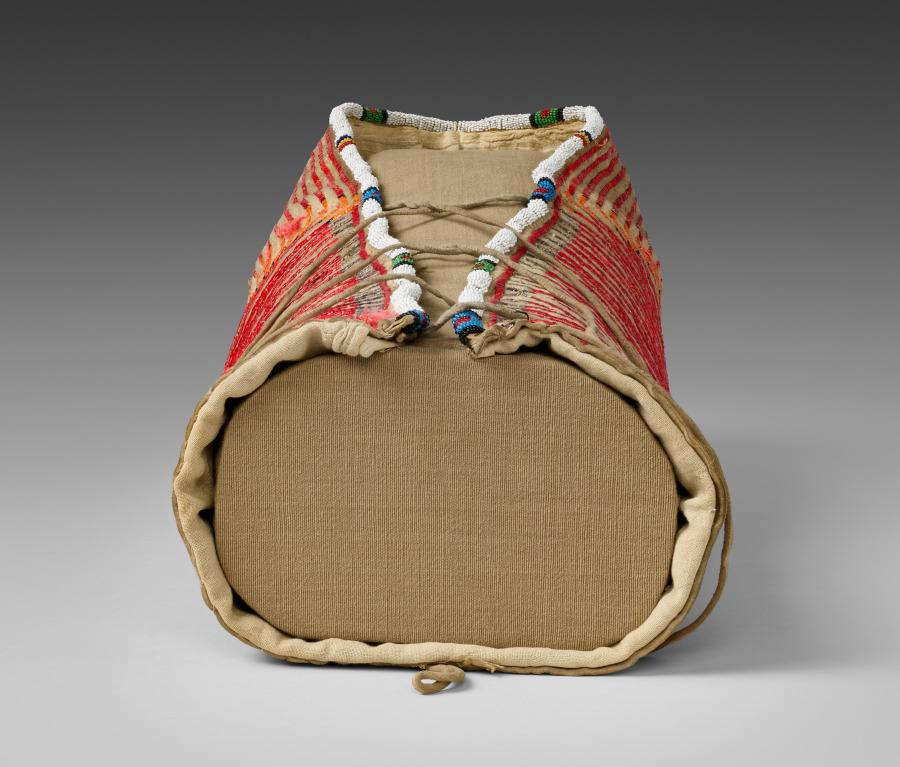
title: Cradle Board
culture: America, Native North American, Lakota (Sioux), Post-Contact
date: c. 1900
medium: leather, quills, beads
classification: Leather